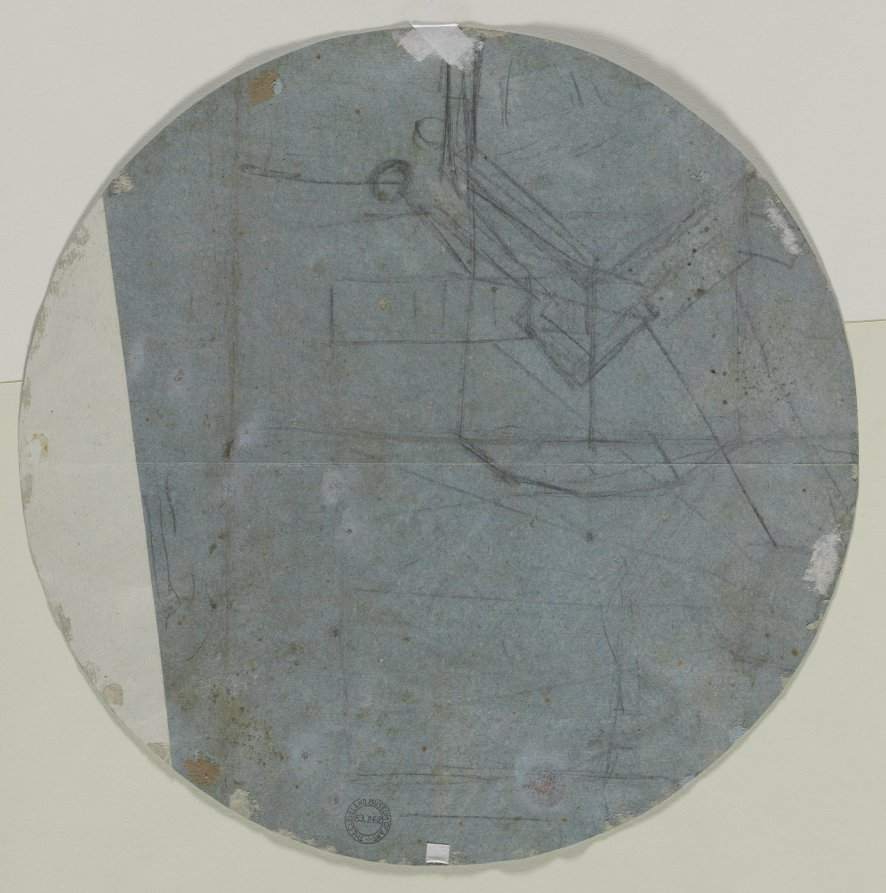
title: Architectural Sketch(?) (verso)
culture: Italy, 17th century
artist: Giovanni Battista Benaschi (Italian, 1636–1688)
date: second half 17th century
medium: black chalk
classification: Drawing